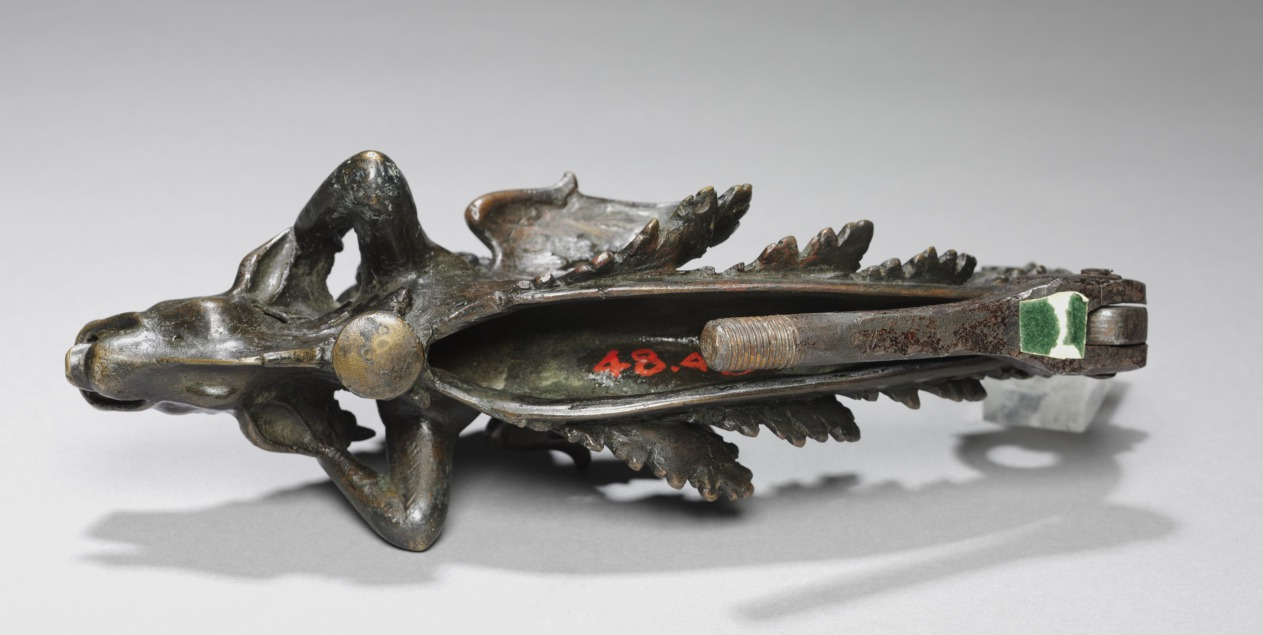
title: Doorknocker with a Satyr Pulling an Ox's Horns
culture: Italy, early 16th Century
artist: Andrea Riccio (Italian, c. 1470–1532)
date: 1800s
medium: bronze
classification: Sculpture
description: Fanciful bronzes such as this one were extremely popular in the late 1500s in the north of Italy, where sculptors such as Andrea Riccio and Severo da Ravenna often featured bizarre imaginary creatures in their sculptures. These artists exerted a long-lasting influence on their peers and followers for the remainder of the 1500s. However, this sculpture was not made in the 1500s. Based on the weight and style of the Doorknocker, it is most likely that it was made in the 1800s to mimic the style of Riccio and his followers. This sculpture is solid; in the 1500s artists created hollow sculptures to reduce the costs of the object and to decrease the chances of flaws in the sculpture. However, in the 1800s when better bronze casting technology evolved and the price of the metal was less costly, artists created solid bronze sculptures based on sixteenth-century designs. In particular, there was a considerable market in England for Renaissance revival doorknockers to be used decoratively on pub doors.